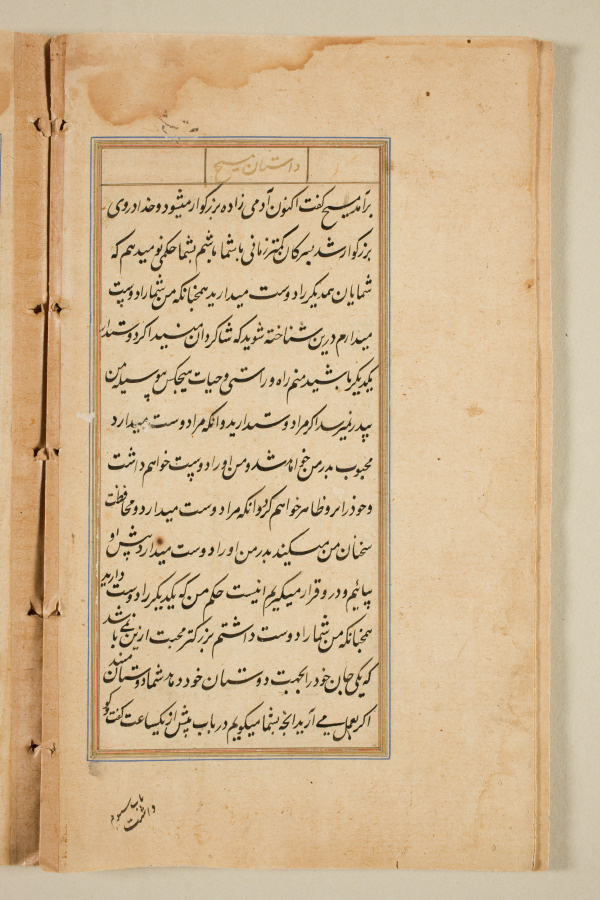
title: Text page from a Mirror of Holiness (Mir’at al-quds) of Father Jerome Xavier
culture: Mughal India, Allahabad, made for Prince Salim (1569–1627)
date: 1602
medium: Ink and gold on paper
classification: Manuscript